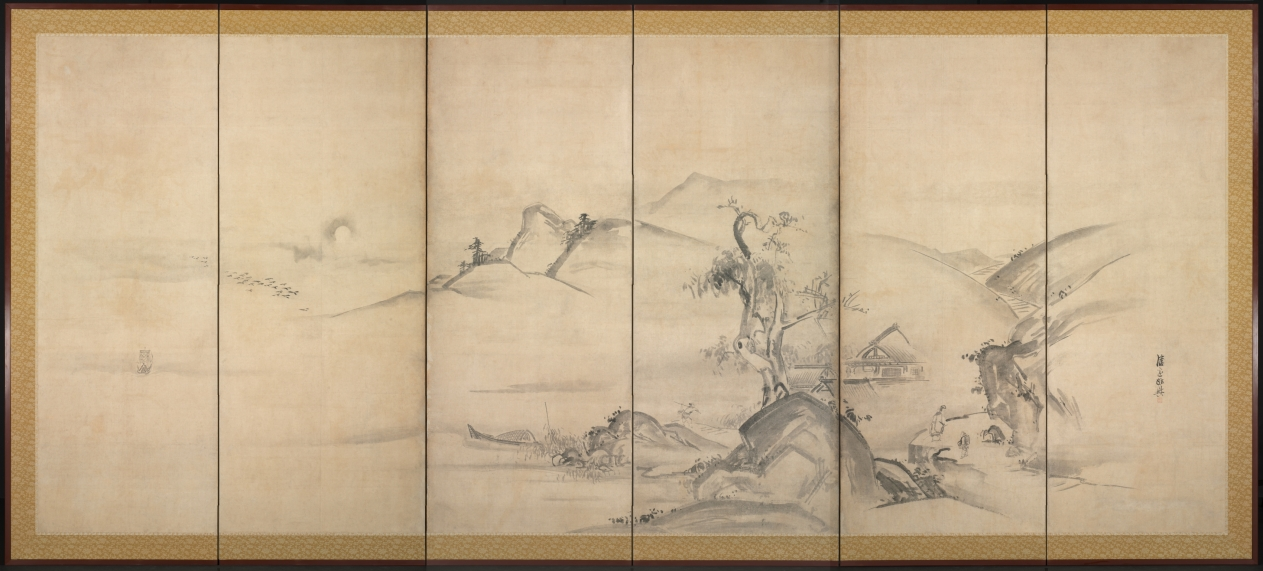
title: Eight Views of the Xiao and Xiang Rivers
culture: Japan, Edo period (1615–1868)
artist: Watanabe Shikō (Japanese, 1683–1755)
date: 1700s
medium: Six-panel folding screen, ink on paper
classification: Painting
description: Watanabe Shiko, an Edo period painter who combined Kano school style with Rimpa style, re-created the Xiao and the Xiang rivers on a pair of eight-panel screens. For this composition, he followed the Kano school’s sense of space, adapted from miniature copying paintings (shukuzu) by the Japanese artist Kano Tanyu. Watanabe revised the typical representations of the Xiao and the Xiang rivers by rendering the theme Wild Geese Descending to Sandbar on the right screen and Evening Bell from Mist-Shrouded Temple on the left screen. He depicted simple motifs—moon, boat, geese, and temple—to suggest the other scenes while also creating airy space.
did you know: This screen forms a pair with CMA 1960.284.